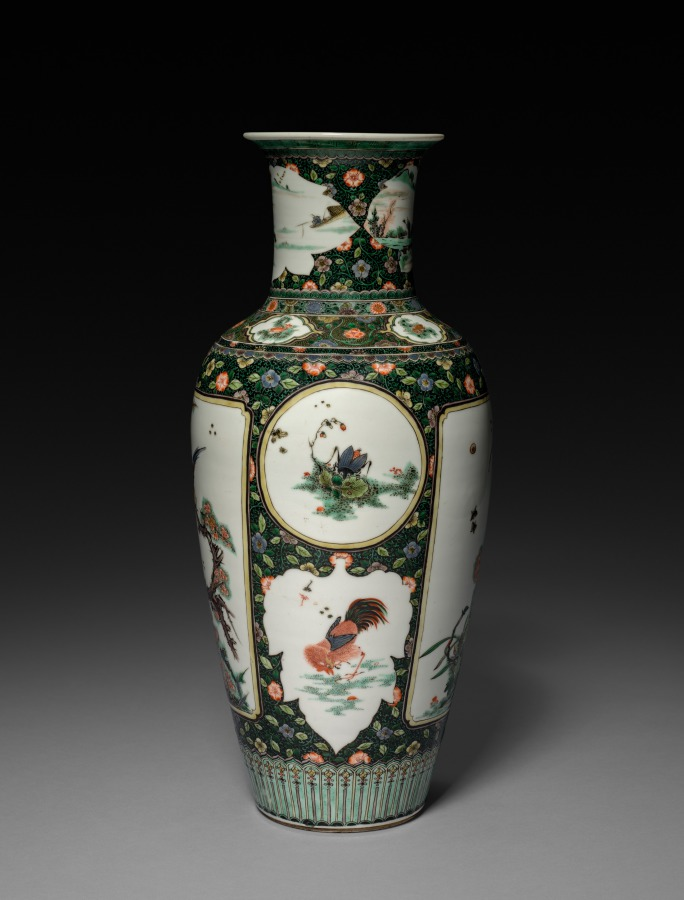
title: Baluster Vase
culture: China, Qing dynasty (1644-1911), Kangxi reign (1661-1722)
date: 1662–1722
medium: porcelain with famille verte overglaze enamel decoration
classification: Ceramic